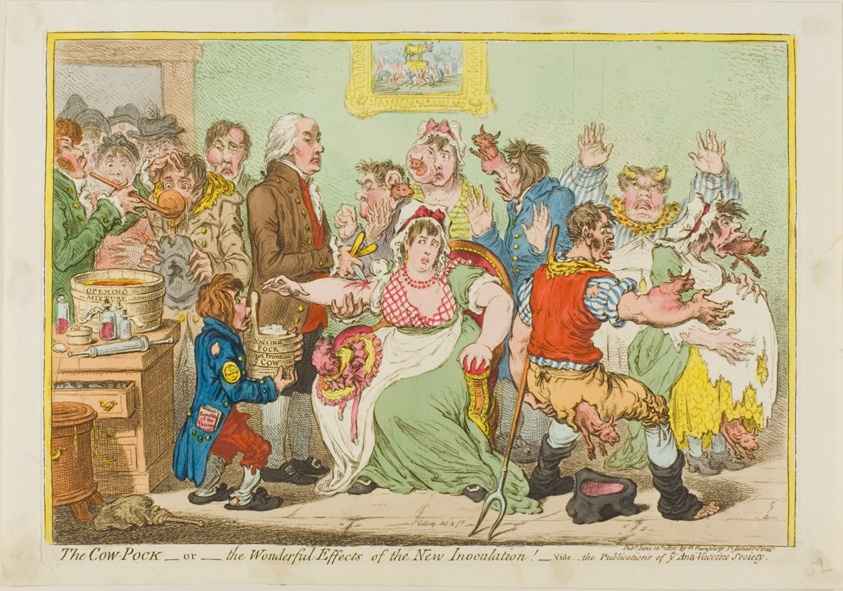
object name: Print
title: The Cow-Pock- or- The Wonderful Effects of the New Innoculation!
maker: James Gillray (English, 1756-1815); published by Hannah Humphrey (English, c. 1745-1818)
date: June 12, 1802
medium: Etching with hand-coloring on cream wove paper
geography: England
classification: etching; print; prints and drawing